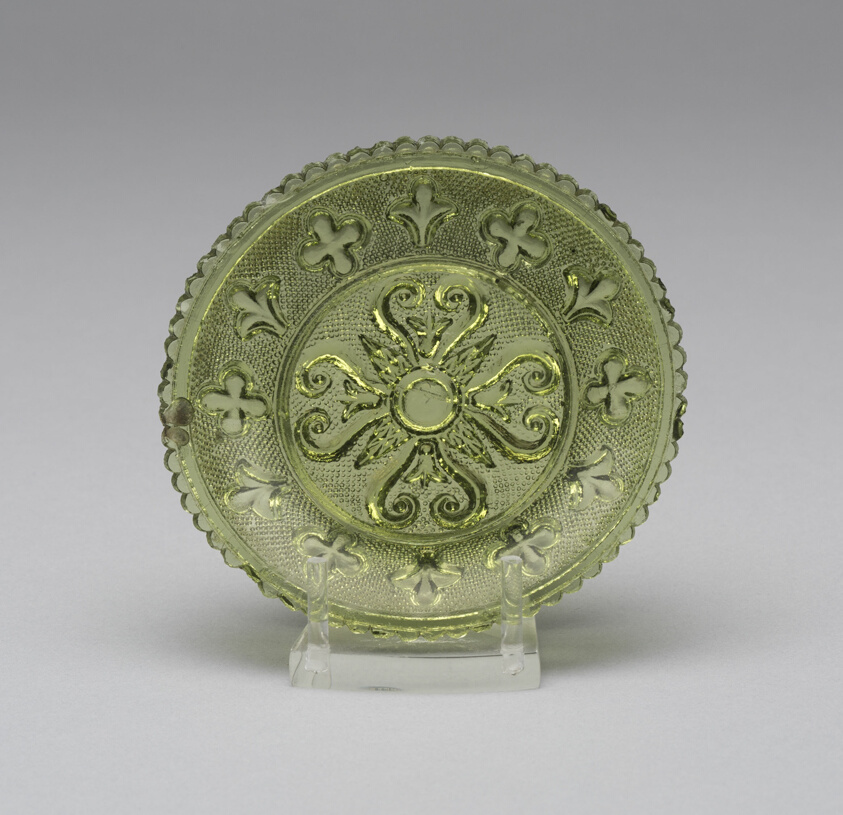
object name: Glass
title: Cup plate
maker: Artist unknown (American, 19th century); Midwest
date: 1830–35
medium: Pressed glass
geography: Midwest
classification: plate (general, dish); glass; american decorative arts; american arts; decorative arts